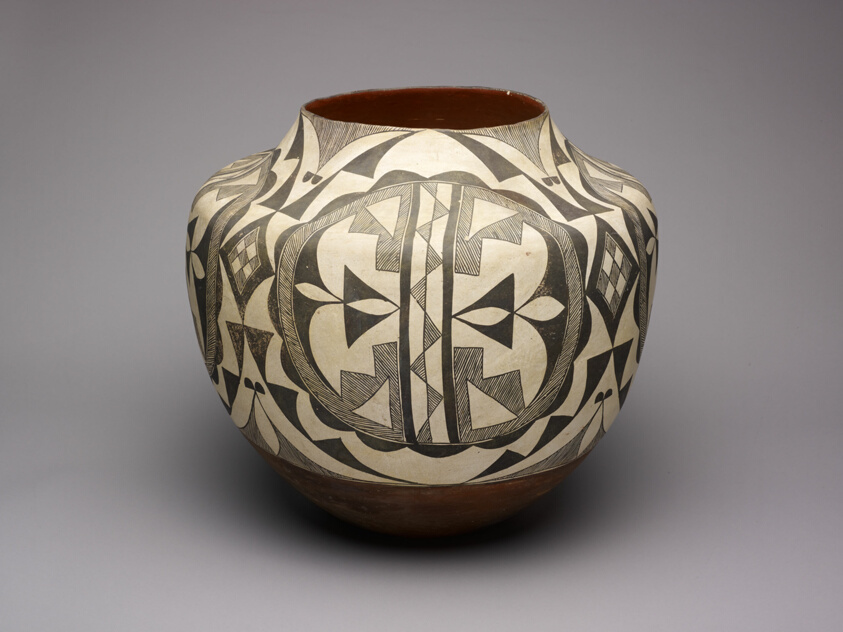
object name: Vessel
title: Black-and-White Storage Jar with Abstract Geometric Motifs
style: acoma, southwest, pueblo, americas, native american, native north american, Arts of the Americas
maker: Acoma; Acoma Pueblo, New Mexico, United States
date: 1890s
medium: Ceramic (earthenware) and pigment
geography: New Mexico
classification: vessel; ceramics; art of the americas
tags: geometric, water, storage, servingware, patterns, floral, plant-derived motif